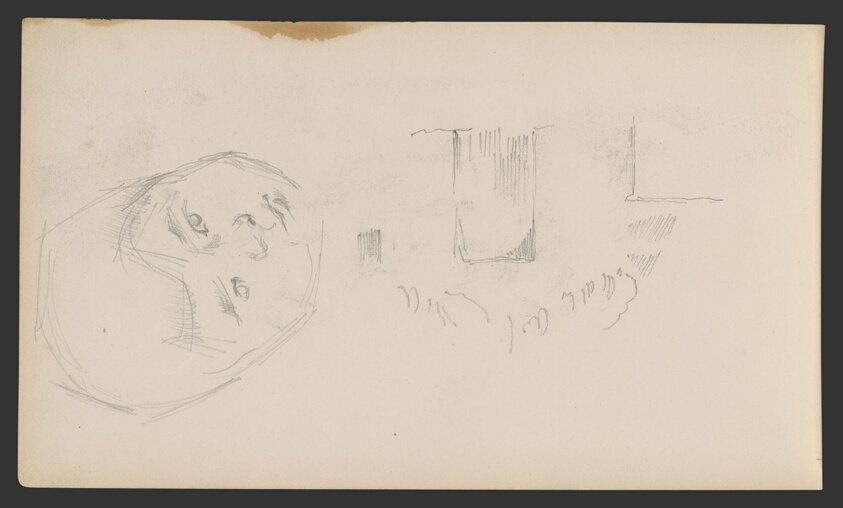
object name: Drawing and Watercolor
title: Sketchbook No. 2 (L'Estaque)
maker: Paul Cézanne; French, 1839-1906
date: 1875–86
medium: Graphite and pen and ink drawings on paper, bound into a book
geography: France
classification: sketchbook; graphite; prints and drawing; paper